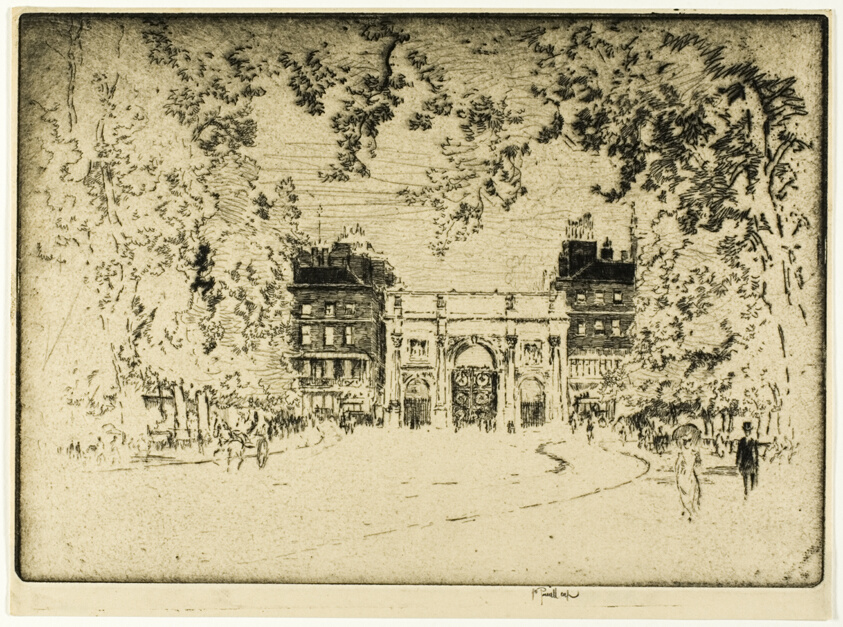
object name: Print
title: The Marble Arch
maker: Joseph Pennell (American, 1857-1926)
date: 1905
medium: Etching on ivory wove paper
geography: United States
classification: etching; print; prints and drawing